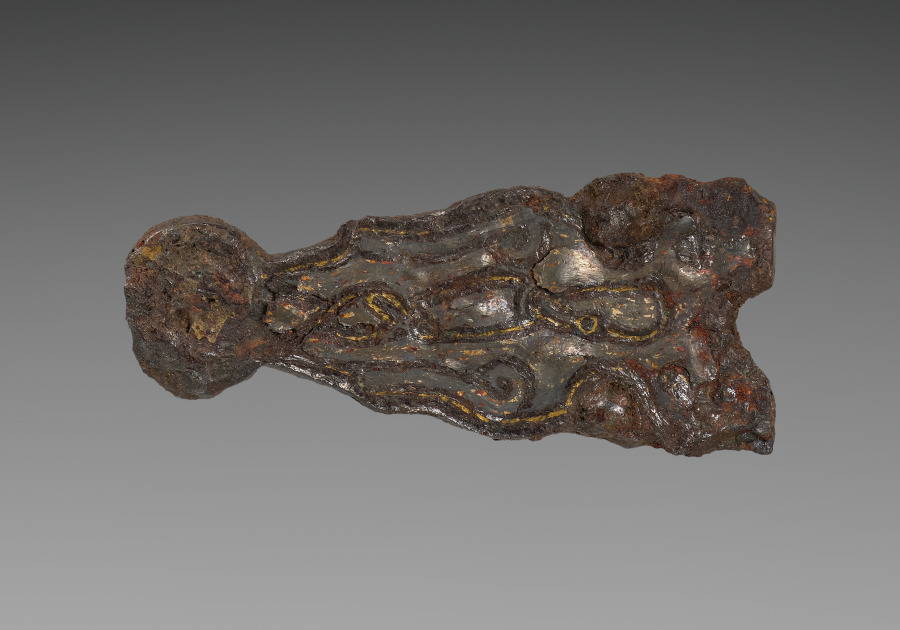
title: Buckle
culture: Merovingian, Burgundian, Migration period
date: 600s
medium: iron with silver overlay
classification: Jewelry